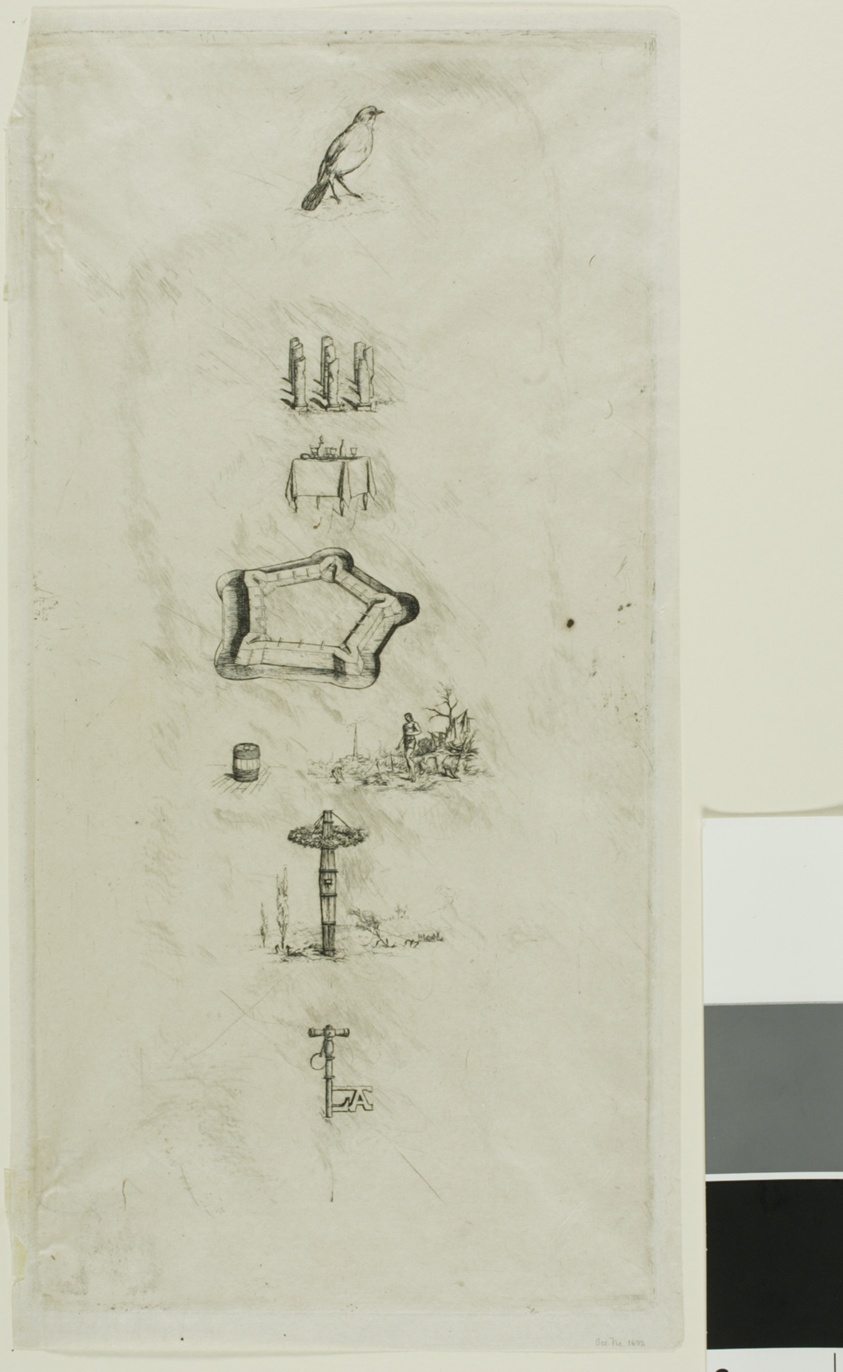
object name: Print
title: Rebus: Béranger was not Really Strong, for he Never had the Key of the Fields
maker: Charles Meryon (French, 1821-1868)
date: 1863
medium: Etching with burnishing on grayish ivory laid chine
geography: France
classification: etching; print; prints and drawing